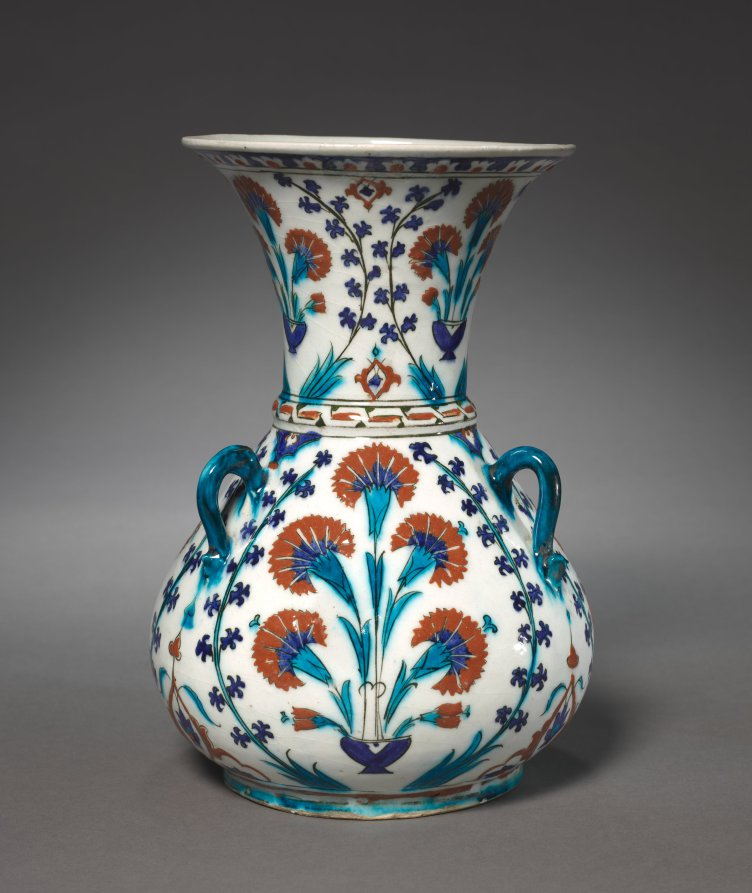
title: Mosque Lamp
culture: Turkey, Iznik, Ottoman period (1299–1922)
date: 1585–95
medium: Fritware with underglaze design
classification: Ceramic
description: Mosque lamps typically functioned as a lampshade, containing an oil lamp inside. Due to the opacity of this Ottoman lamp, it is likely that its primary function was not illumination. Instead, it would have been hung from chains in a mosque or mausoleum to add to the beauty of the space. This lamp is decorated with bright red carnations and blue hyacinths with additional floral and vegetal elements. The turquoise loops would have served for suspension from the ceiling. It is also possible that lamps like this were used as acoustic devices, softening the echo of prayer and discussion within the mosque’s halls.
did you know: Fritware is made of ground quartz, glass frit, and a small proportion of fine white clay to approximate the light color and weight of Chinese porcelain.